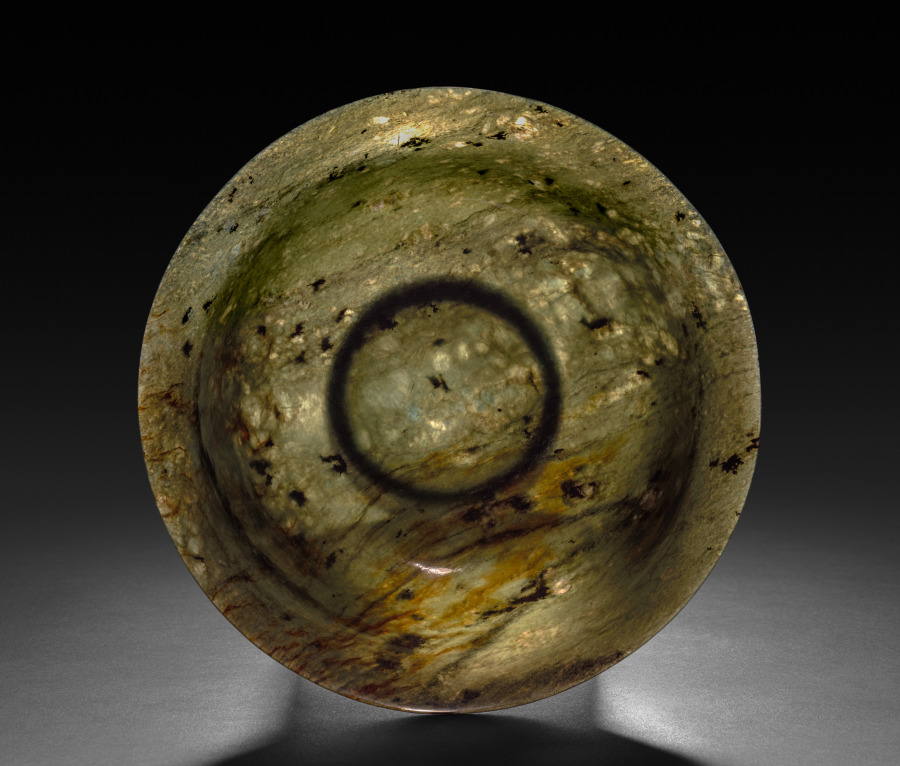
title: Bowl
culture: China, Qing dynasty (1644–1911), Qianlong reign (1736–95)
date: 1736–95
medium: spinach jade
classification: Jade